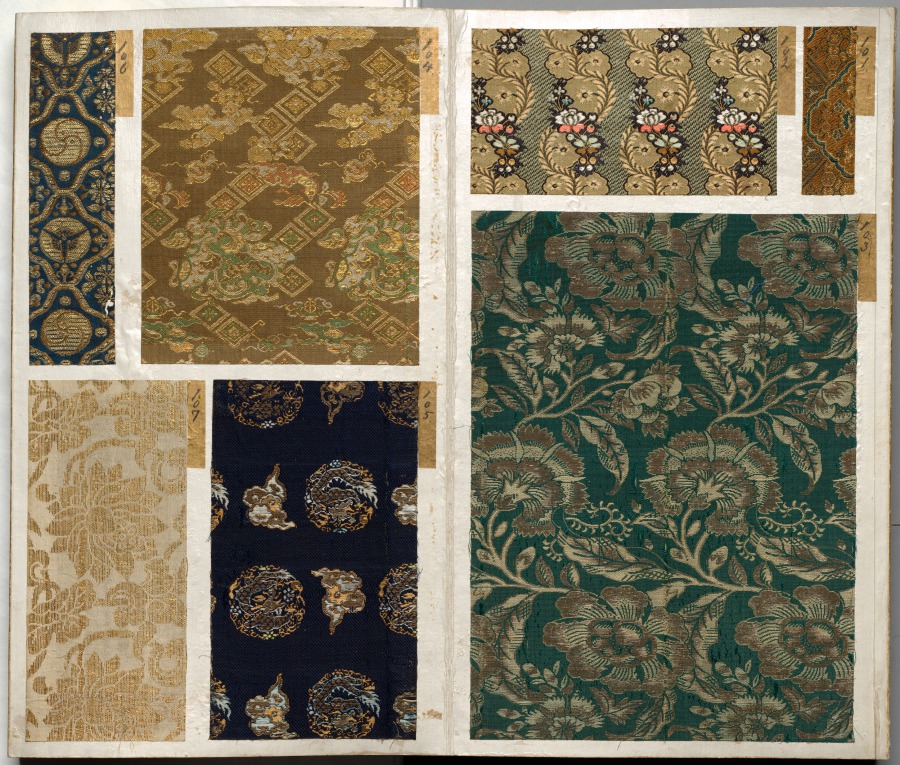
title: Album of Textile Samples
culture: Japan, Edo period (1615–1868)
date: 1600s-1700s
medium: silk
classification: Textile